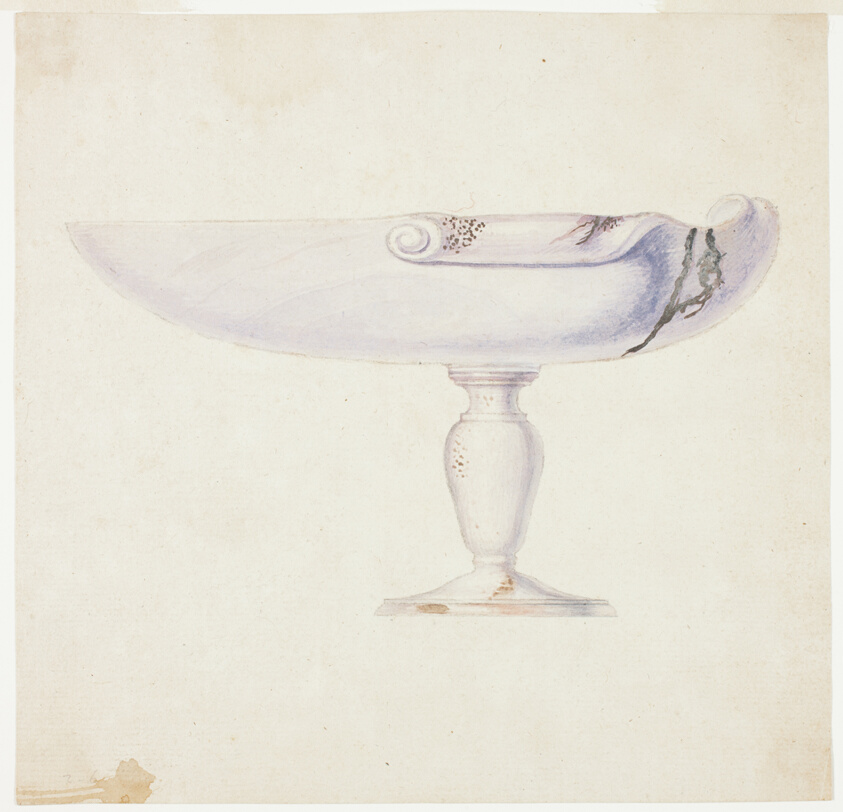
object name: Drawing and Watercolor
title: Purple Shell on a Stand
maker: Giuseppe Grisoni (Italian, born Flanders, 1699-1769)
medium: Gouache over black chalk, on ivory laid paper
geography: Flanders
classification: gouache; watercolor; drawings (visual works); prints and drawing